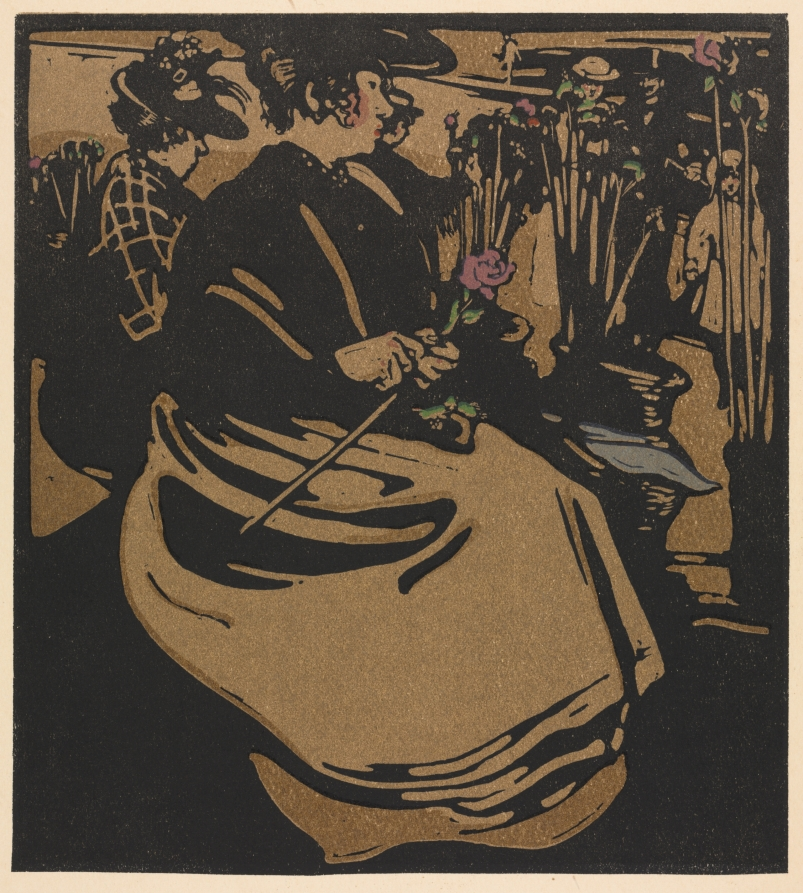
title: London Types: Flower Girl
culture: England, 19th century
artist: William Nicholson (British, 1872–1949)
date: 1898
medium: color lithograph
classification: Print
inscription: Top right: "58" encircled Bottom left: "LT-9" Verso, printed, center: "ANY BAR / Though, if you ask her name, she says ELISE, / Being plain ELIZABETH. e /en letit pass, / And own that, if her asprales tote their ease / She ever makes a point, in washing glass, / Handling the engine, turning taps for tots, / And countering change, and scorning what men say, / Of posing as a clove among the pots, / Nor often gives her dignity away. / Her head's a work of art: and, if her eyes / Be tied and ignorant, she has a waist; / Cheaply the mode she shadows; and she tries / from penny novels to amend her taste; / And, having mopped the zinc for certain years / And faced the gas, she fades and disappears."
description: London Types celebrates the affection residents felt for their city at the end of the 19th century. The series includes many depictions of women because the publisher William Heinemann, a strong supporter of the struggle for equality, advised the artist to represent both sexes equally. The scenes document London of the 1890s with contemporary references.